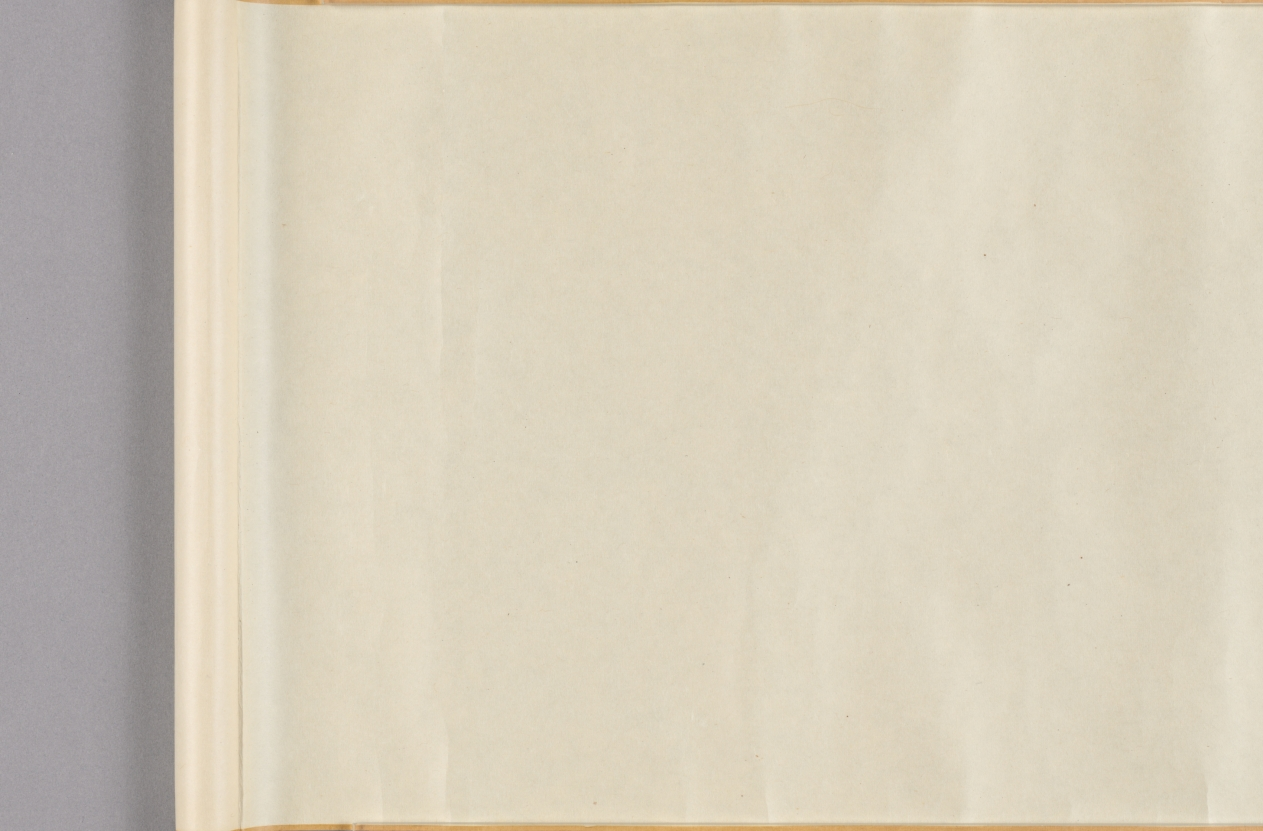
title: Selections from the New Collection of Japanese Poems from Ancient and Modern Times (Shinkokin wakashū) with Printed Designs of Chinese Lions and Crab Finger Grass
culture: Japan, Edo period (1615–1868)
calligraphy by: Hon'ami Kōetsu (Japanese, 1558–1637)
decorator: Tawaraya Sōtatsu (Japanese, c. 1570–c. 1640)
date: early 1600s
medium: handscroll; ink, gold, and silver on paper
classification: Calligraphy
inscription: Seal: 光悦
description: Hon’ami Kōetsu was a calligrapher and craftsman who frequently collaborated with the painter Tawaraya Sōtatsu, considered the first master of the Rinpa school. Kōetsu brushed seven poems from the autumn section of a poetry anthology onto dyed paper with motifs designed and printed in gold and silver by Sōtatsu.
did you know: Before becoming a master painter of screens, Tawaraya Sōtatsu painted fans.